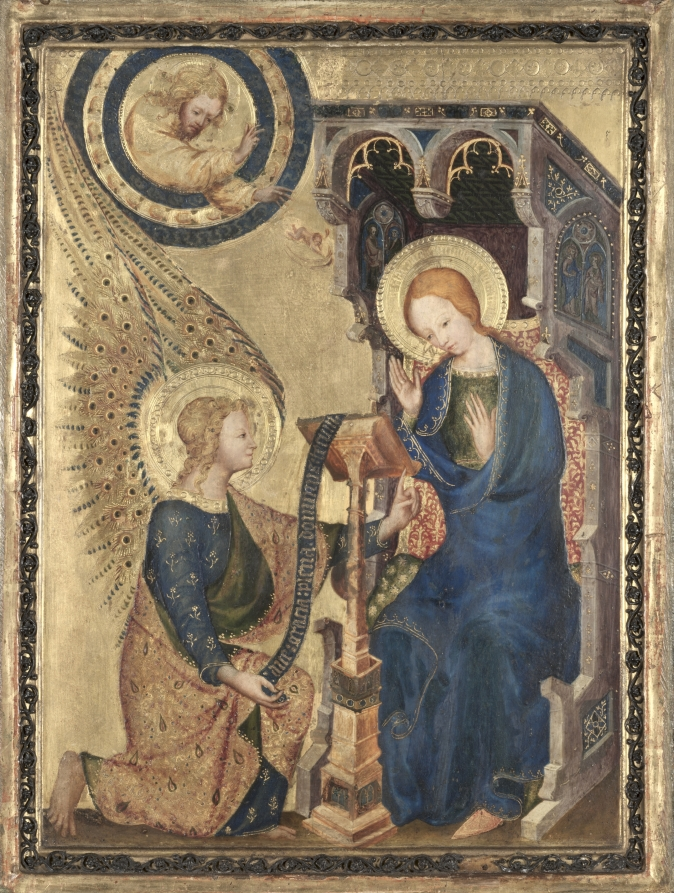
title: The Annunciation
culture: Netherlands, or possibly France, 14th century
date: 1380s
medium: tempera and oil with gold on wood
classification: Painting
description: This small but opulent panel painting was once joined to another panel with hinges to form a diptych. Given its small size, its original function was for private devotional use. It could be folded like a book when not in use and was highly portable. The missing panel has not been positively identified but probably represented another biblical scene like the Crucifixion. The painting’s refined and ornate style reflects the courtly aesthetic that appealed to royal and aristocratic patrons in the decades around 1400. On the panel’s richly tooled reverse (not visible) are the arms of the house of Hainault quartered with those of Bavaria. While this coat of arms is certainly that of the work’s patron, probably a member of the united dynasties of Hainault and Bavaria, their identity remains elusive.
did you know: In this depiction of Gabriel, the angel's wings resemble the feathers of a peacock.